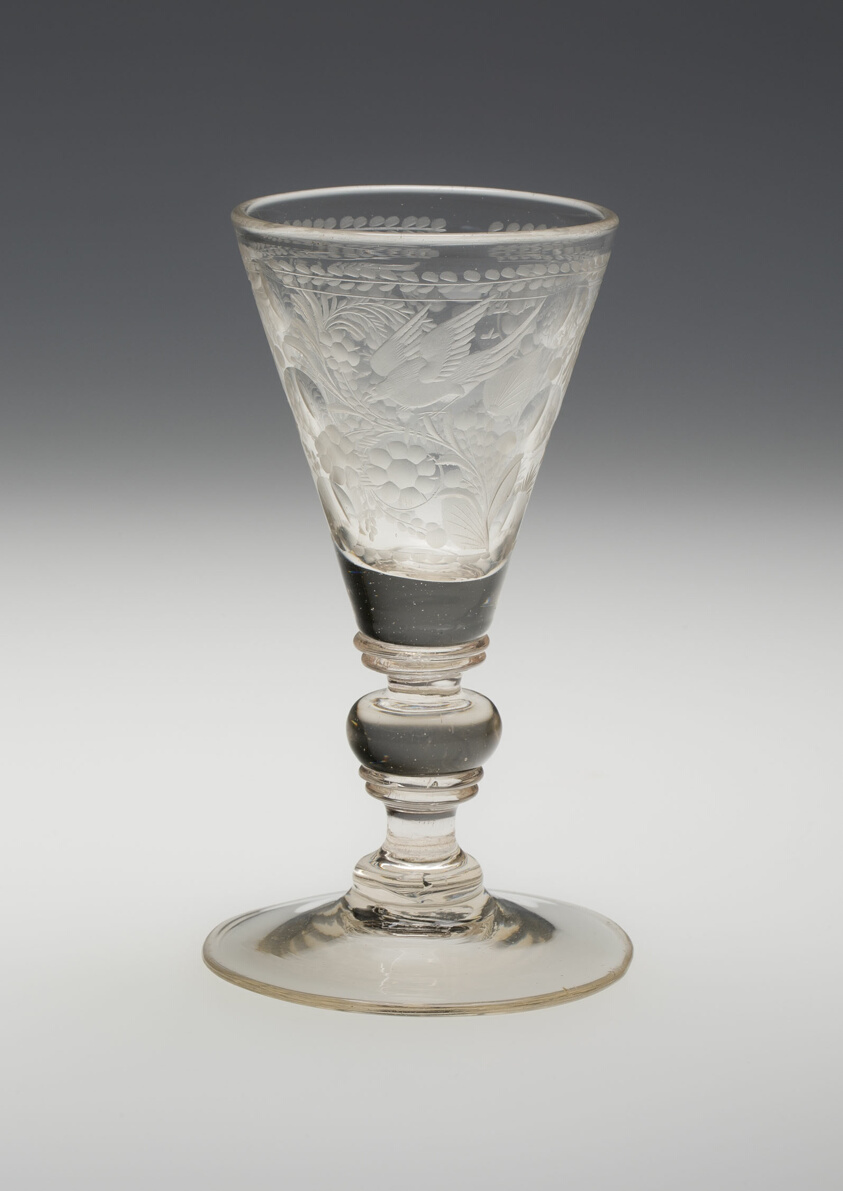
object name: Glass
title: Wine Glass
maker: England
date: c. 1730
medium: Glass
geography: England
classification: drinking vessel; european decorative arts; glass